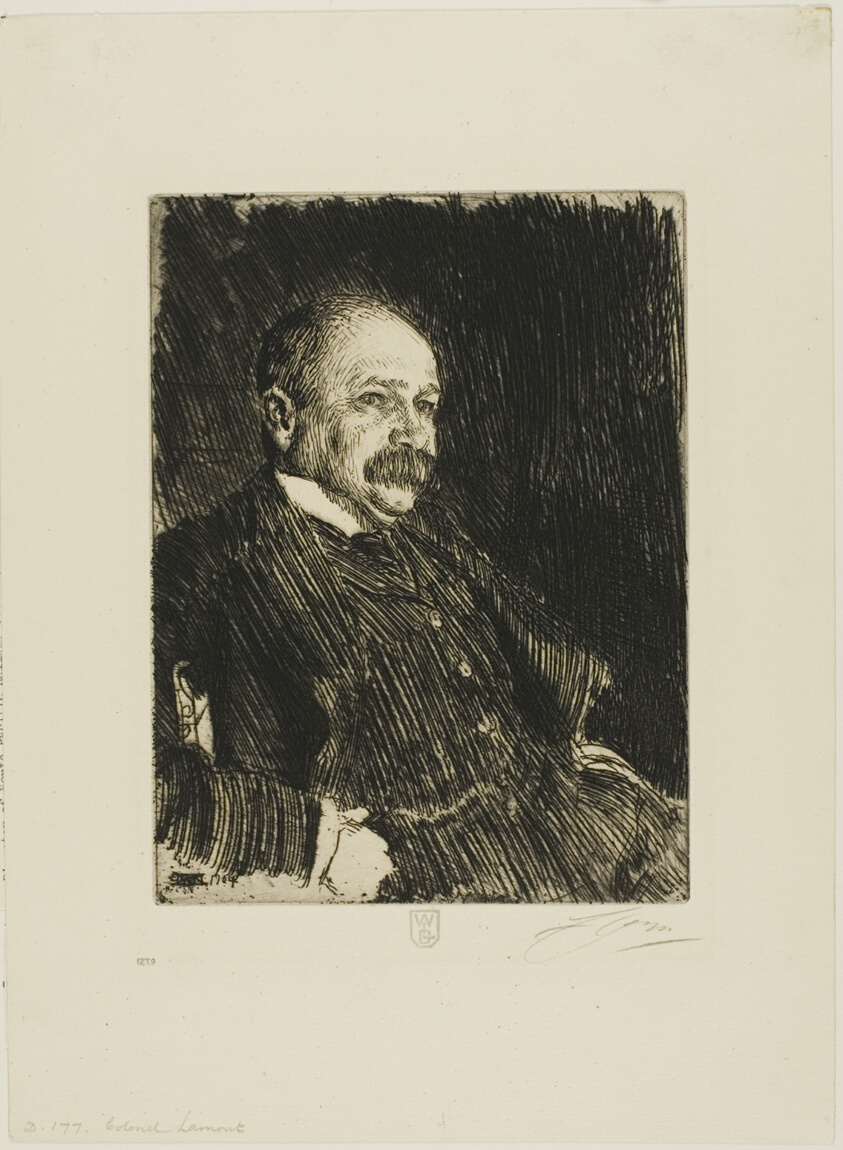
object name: Print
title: Colonel Lamont III (Bust)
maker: Anders Zorn (Swedish, 1860-1920)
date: 1904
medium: Etching on ivory laid paper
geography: Sweden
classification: etching; print; prints and drawing